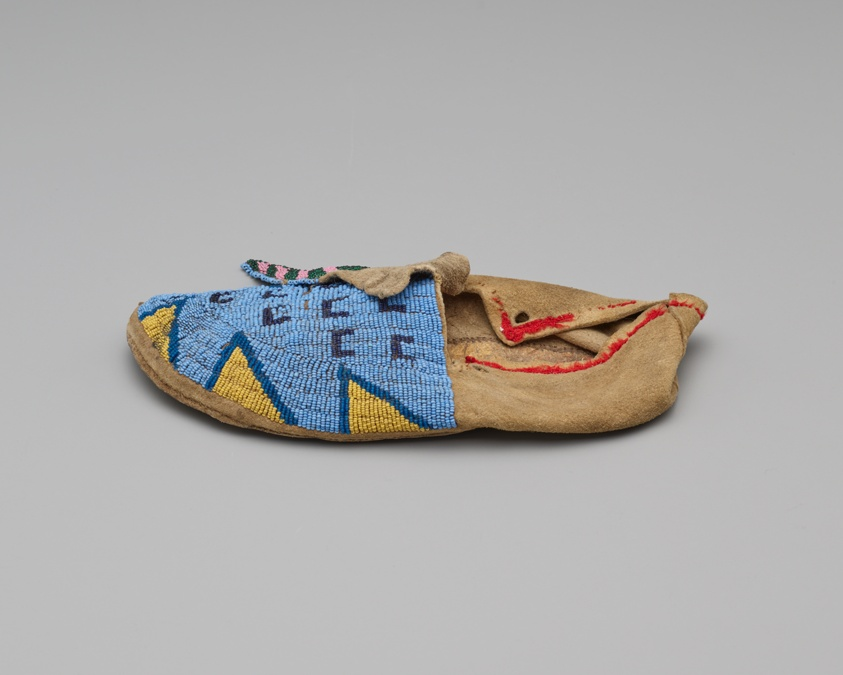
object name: Costume and Accessories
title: Man's Moccasins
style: arapaho, plains indian, native american, americas, Arts of the Americas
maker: Artist unknown (possibly Arapaho, Hinono’ei); Central Plains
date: 1885-90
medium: Leather, red yarn, and glass beads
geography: Central Plains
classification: beadwork; costume; art of the americas